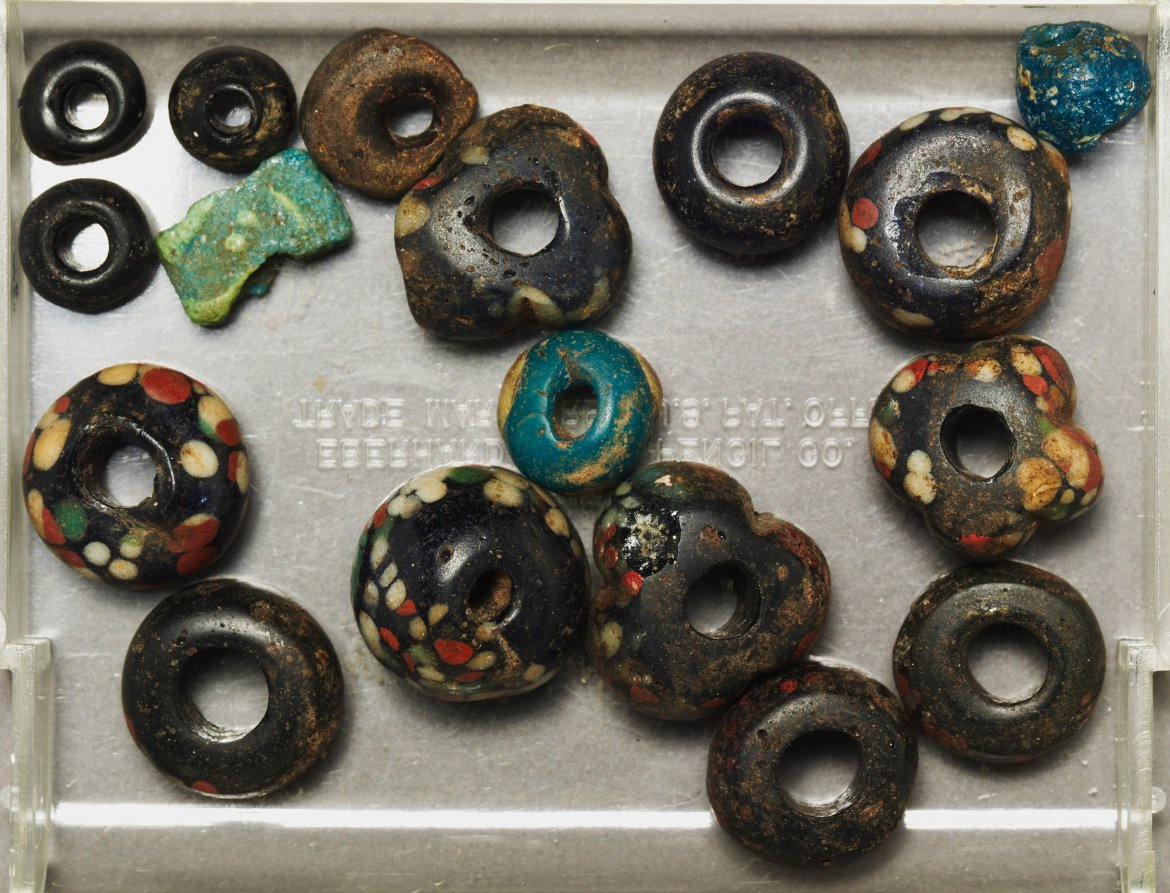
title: Group of Beads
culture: Egypt, Greco-Roman period (332 BCE–395 CE), Roman empire (30 BCE–395 CE)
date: 200–300 CE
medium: glass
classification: Jewelry